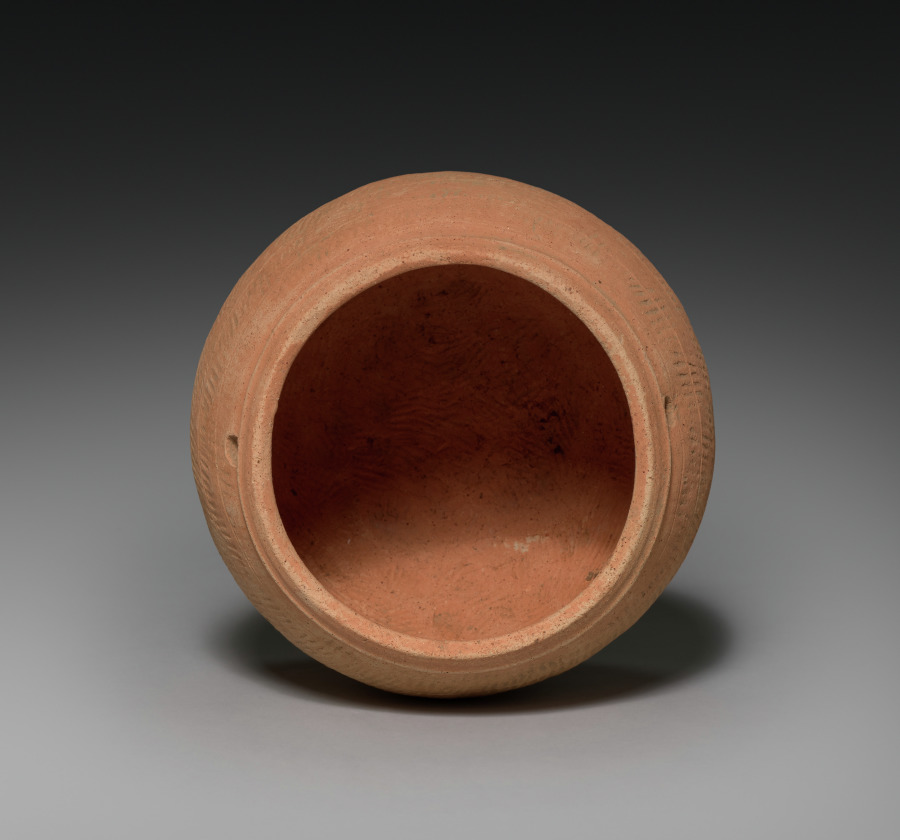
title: Lidded Vessel with Loop Handles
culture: Korea, Iron Age (c. 300–57 BCE)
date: 300–1 BCE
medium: earthenware, with impressed, paddled, and incised decoration and red slip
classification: Ceramic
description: This small storage jar was hand built from coils of clay before it was finished on a potter's wheel. The thick, vertical ridges covering the surface were impressed into the wet clay using a carved wooden paddle. This network of raised lines was then intersected by four incised lines coursing around the bulbous form and separating the body into lower and upper areas with deft visual simplicity. Such direct, effective design solutions to ceramic decoration appear frequently in early Korean ceramics. The two perforations in the upper body were no doubt used to help secure the lid to the body with cord.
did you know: Closed kilns built on hills became widely used for producing this type of pottery vessel in Korea during the Three Kingdoms period.